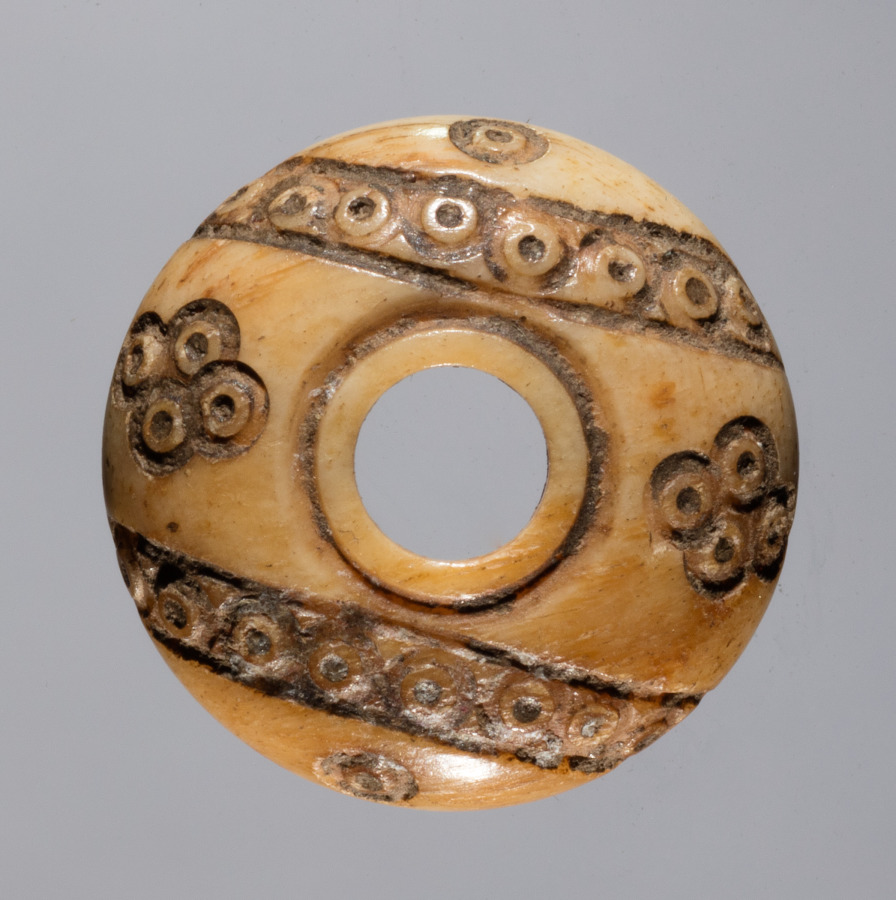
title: Spindle Whorl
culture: Iran, early Islamic period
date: 700s - 900s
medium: bone, incised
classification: Spindle Whorl